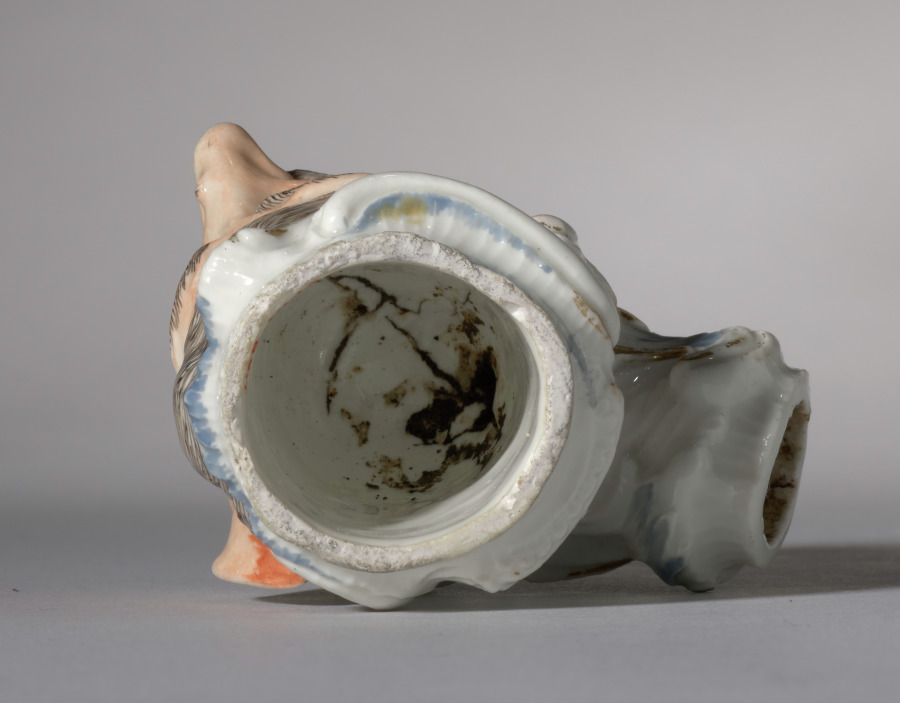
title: Pipe Head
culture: Germany, Nymphenburg, 18th century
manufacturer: Nymphenburg Porcelain Factory (German, founded 1747)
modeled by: Franz Anton Bustelli (Swiss, 1723–1763)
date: mid-1700s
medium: porcelain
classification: Ceramic